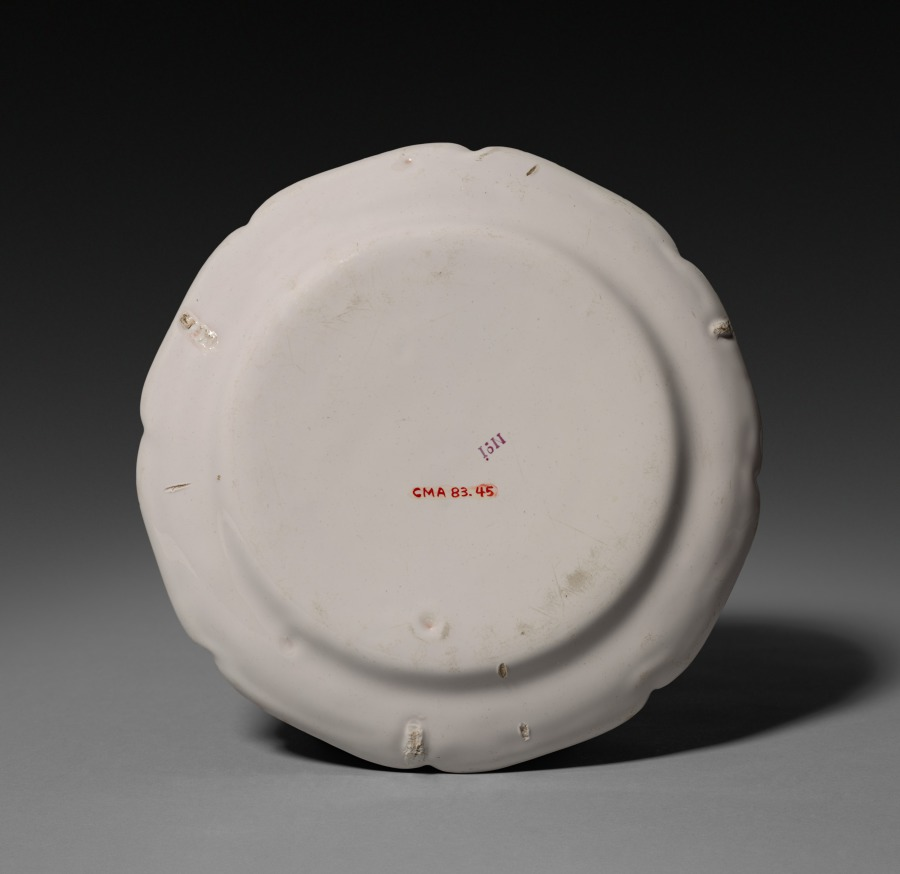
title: Plate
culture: France, 18th century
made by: Niderviller Factory (French)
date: c. 1780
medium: faience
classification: Ceramic